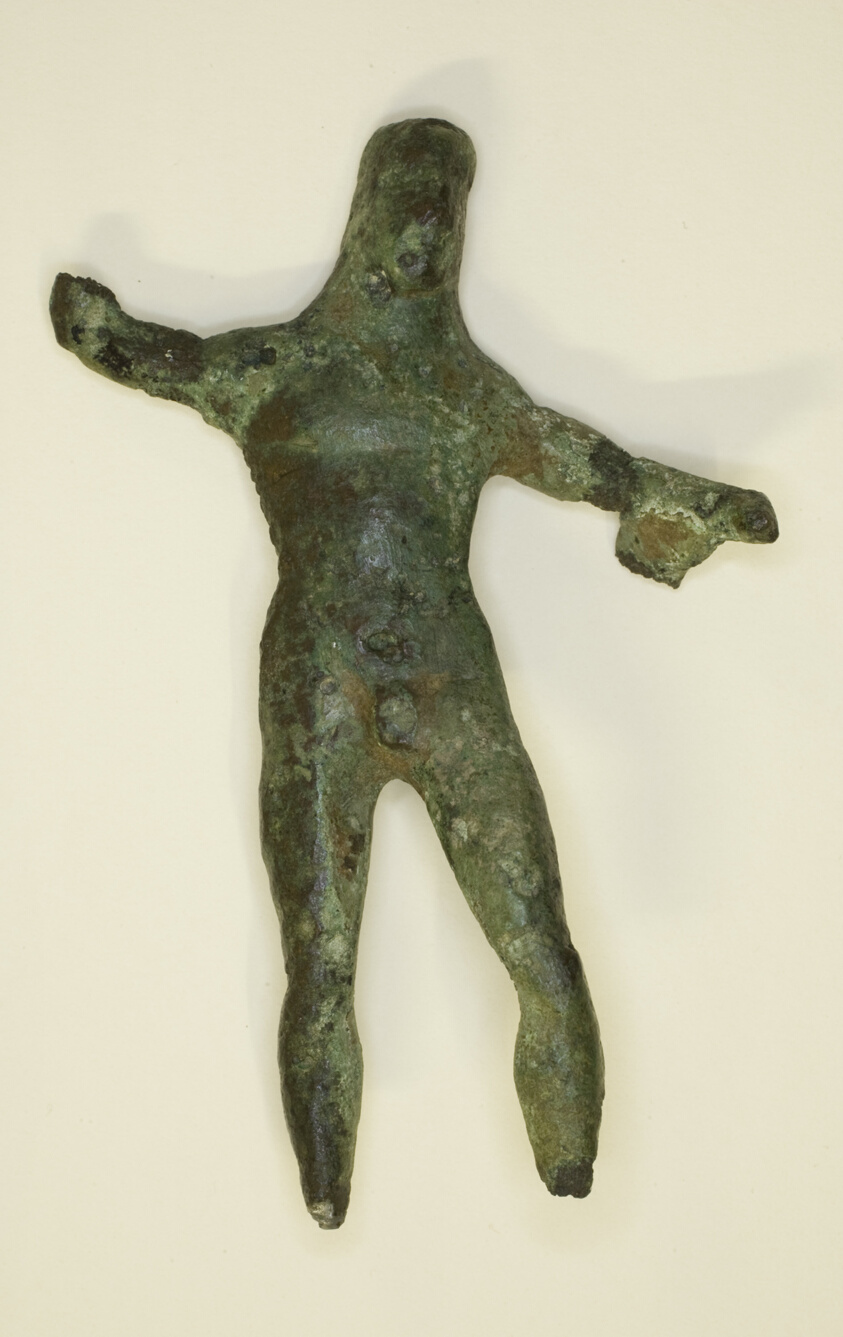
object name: Sculpture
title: Statuette of Herakles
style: etruscan, ancient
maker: Etruscan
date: 4th-3rd century BCE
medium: Bronze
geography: Etruria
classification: statuette; bronze; metal; sculpture; ancient art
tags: Heracles